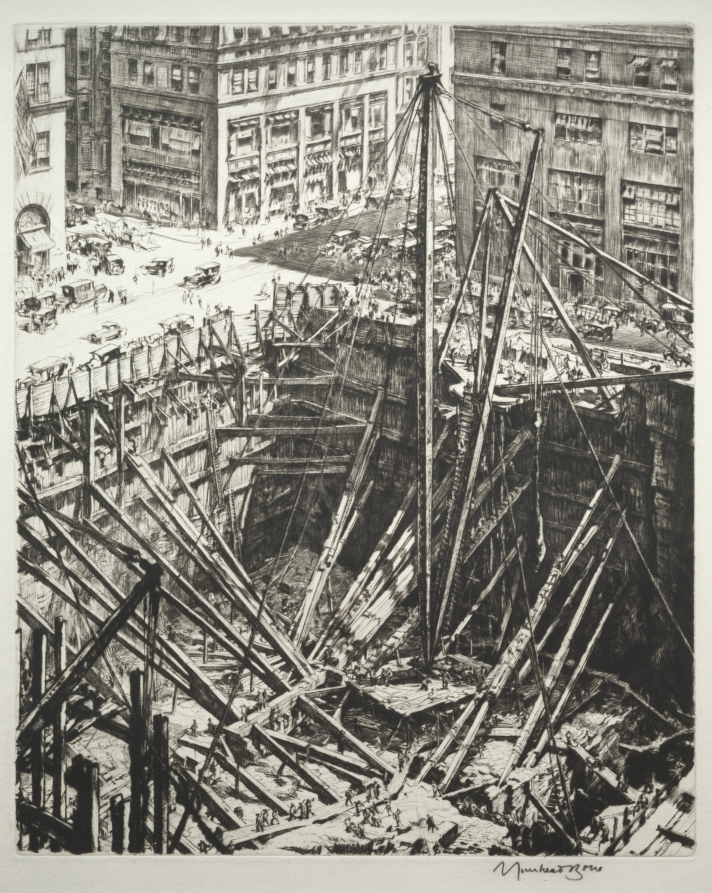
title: Manhattan Excavation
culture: England, 20th century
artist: Muirhead Bone (British, 1876–1953)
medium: drypoint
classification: Print